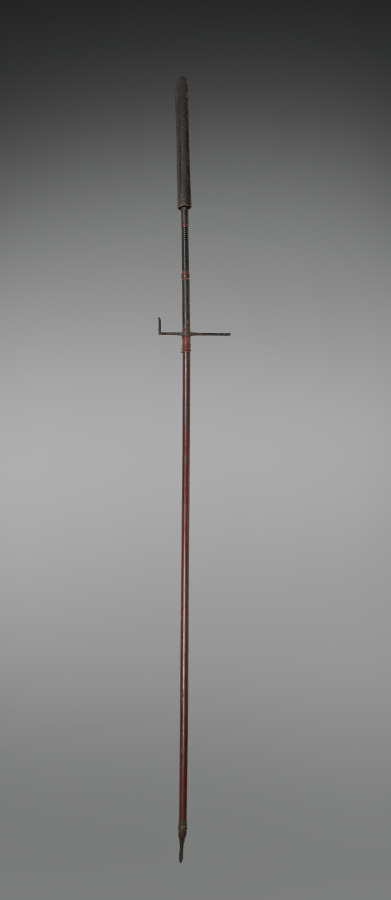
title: Spear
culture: Japan, Edo period (1615–1868)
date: 1700s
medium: wooden handle, metal blade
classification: Arms and Armor